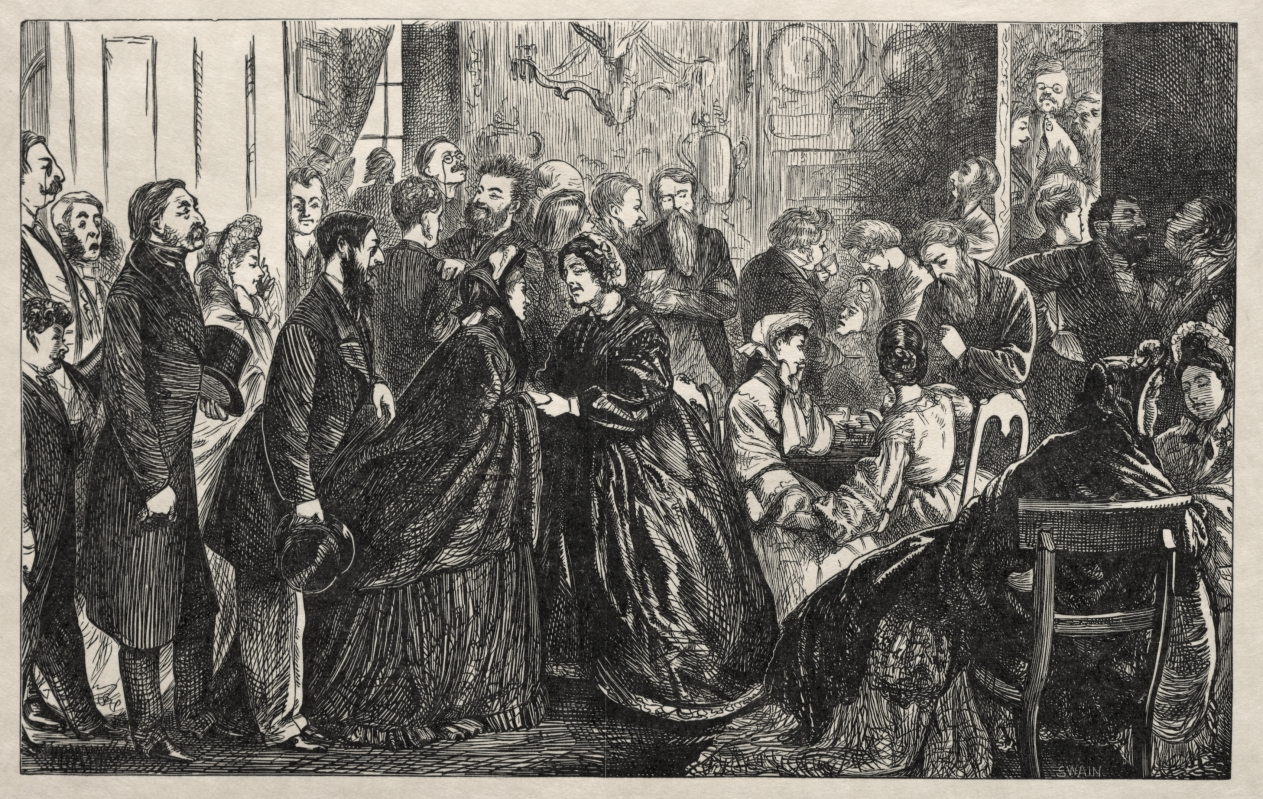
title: A Kettledrum in Mayfair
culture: England, 19th century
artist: George Louis Palmella Busson Du Maurier (British, 1834–1896)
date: 1862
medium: wood engraving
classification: Print